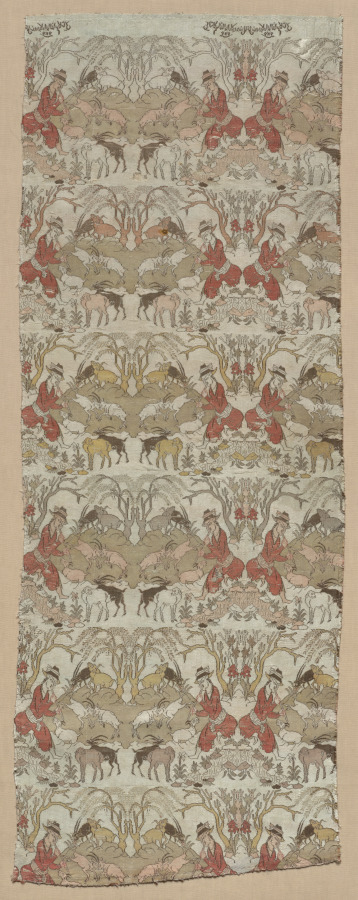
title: Silk Textile with Goatherds in a Landscape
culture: Iran, Isfahan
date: 1900s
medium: Silk: lampas weave; lining: twill tapestry, double locked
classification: Textile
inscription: Work of the servant of the court, Abu al-Qasim Kashani, year 929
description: This textile has a repeated design of goatherds piping to goats in a landscape setting. At the top is an inscription reading: “Work of the servant of the court, Abū al-Quāsim Kāshānī, year 929.” In the Muslim calendar 929 is equivalent to 1523, but this fabric was woven in the 1900s. This textile emulates examples from the Safavid period (1501–1722), regarded as a high point of Iranian culture. A lampas weave is characterized by the combination of two weave structures with two sets of wefts—the threads over and under which the warp threads are woven. Threads of the pattern weft are laid on top of the background weft to form the design. Lampas is typically woven in silk, sometimes with the addition of metallic thread.